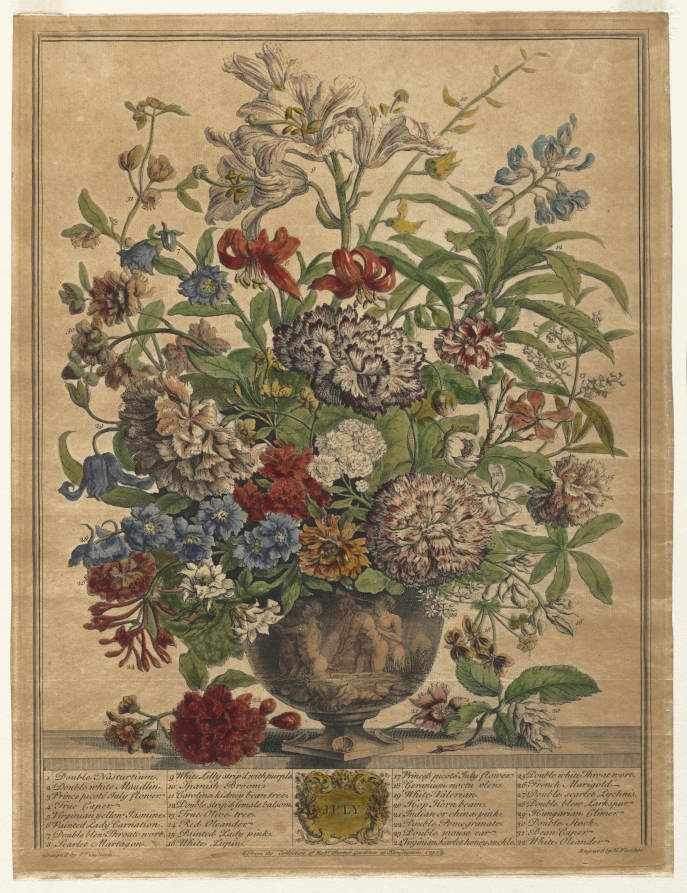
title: Twelve Months of Flowers: July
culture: England, 18th century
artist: Henry Fletcher (British, active 1715–38)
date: 1730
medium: engraving, hand-colored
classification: Print